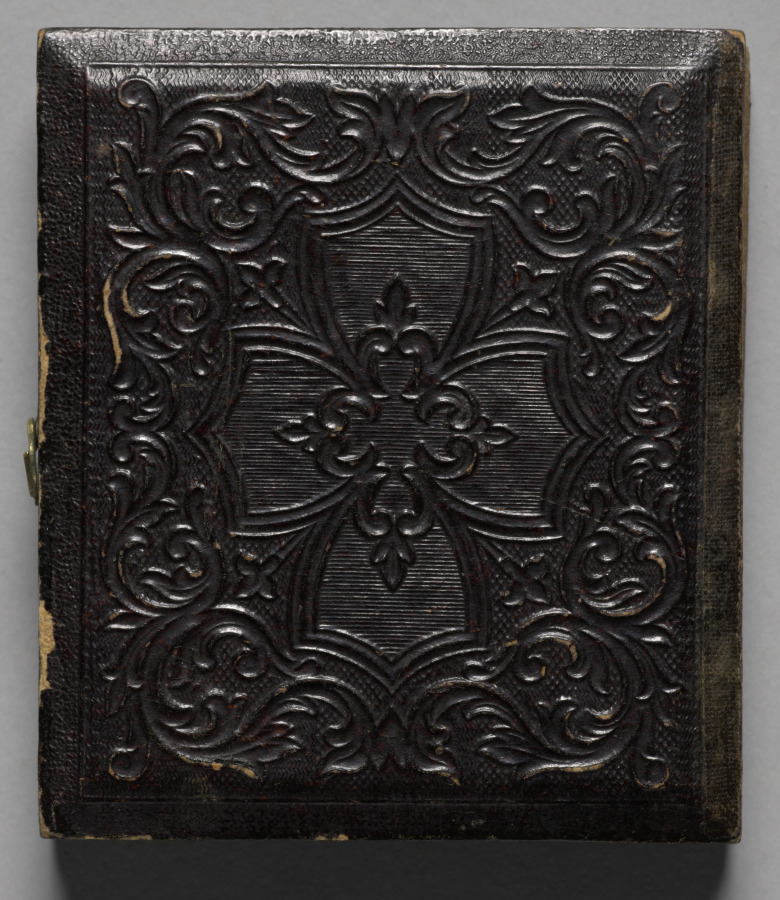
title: Civil War soldier with painted bivouac background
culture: America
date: c. 1861–65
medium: ambrotype, sixth plate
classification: Photograph